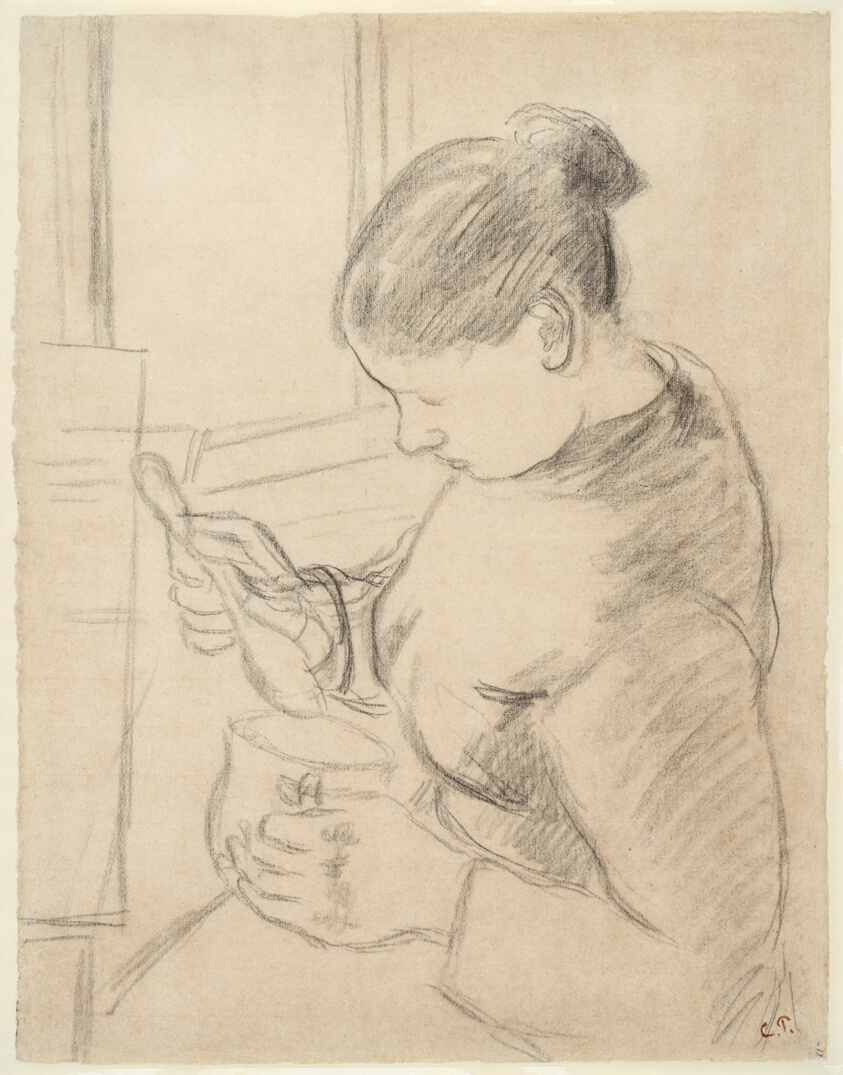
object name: Drawing and Watercolor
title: Young Peasant Having Her Coffee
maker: Camille Pissarro (French, 1830-1903)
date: 1879/80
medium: Black chalk on buff laid paper, laid down on cream wove paper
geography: France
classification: chalk; paper; prints and drawing